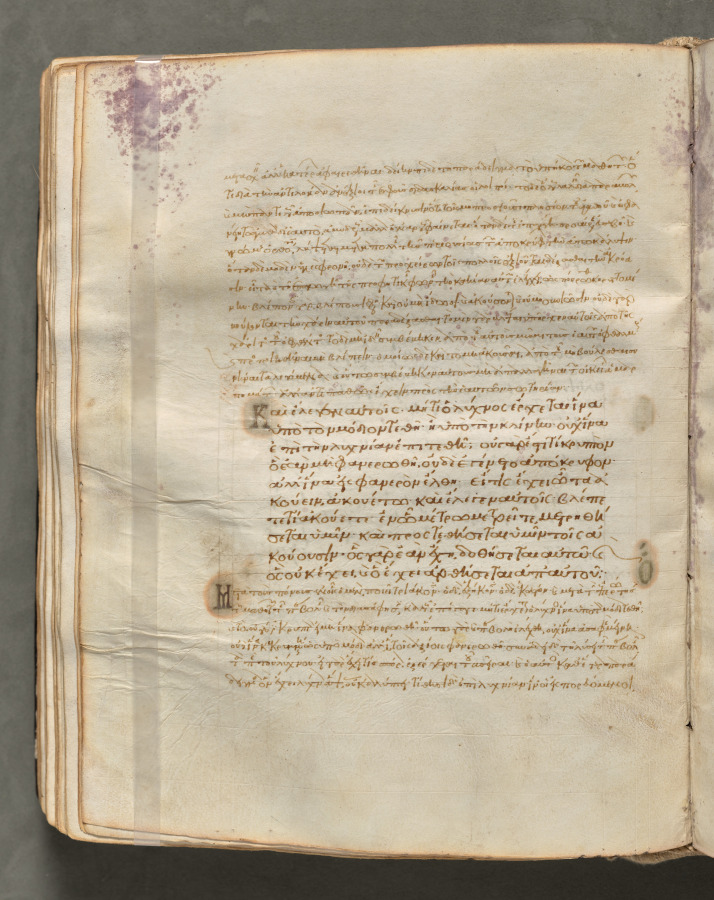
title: Text, folio 144 (verso), from a Gospel Book with Commentaries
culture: Byzantium, Constantinople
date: c. 1000–1100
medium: ink, tempera, and gold on vellum; leather binding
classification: Bound Volume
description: Each of the four gospels in this book opens on a page with brilliantly illuminated borders depicting the author of the text as well as birds-principally peacocks, symbols of the immortality of the soul-and fountains, representing the fountain of life and the salvation of the soul. This volume consists of 428 leaves with texts in Greek. Its level of sophistication suggests that it was probably written and decorated in a monastery in Constantinople.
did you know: Gospel Books were carried in procession through Byzantine churches.